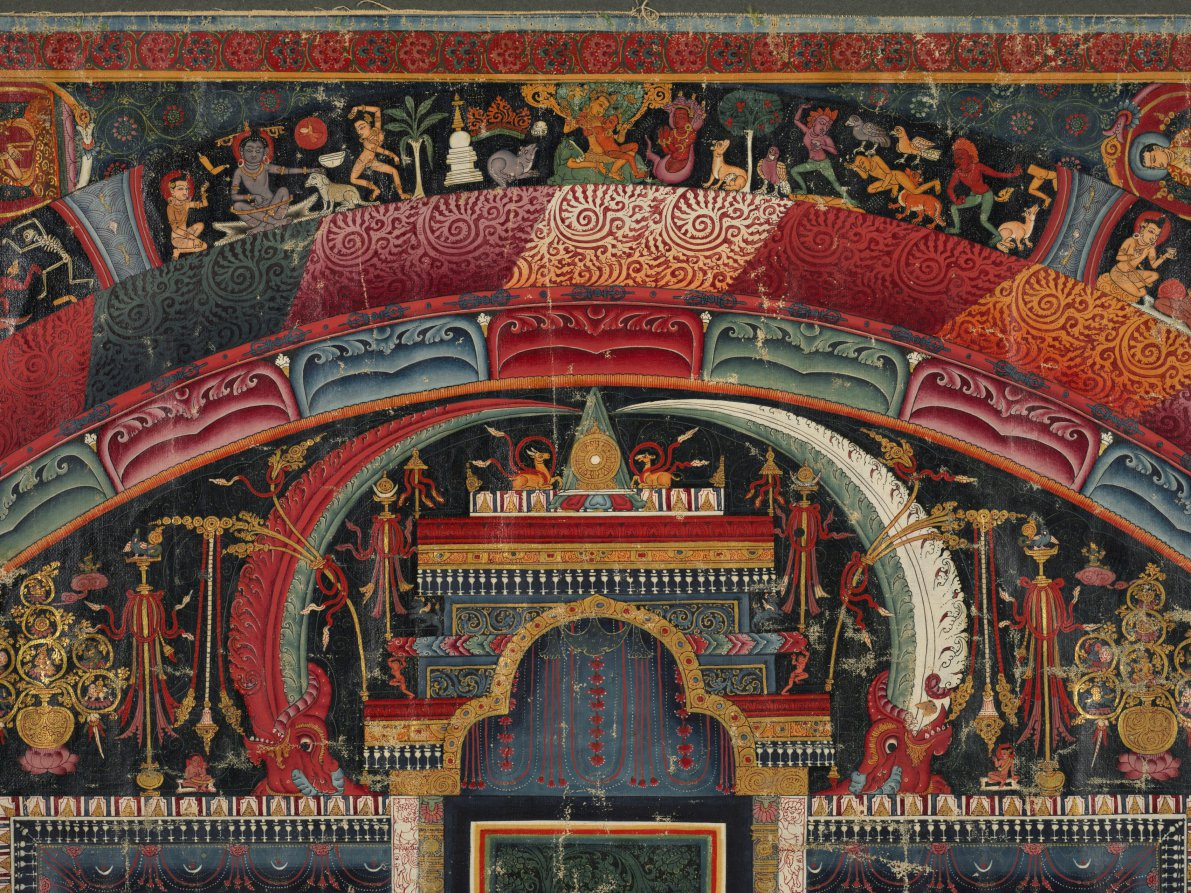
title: Twenty-three Deity Nairatma Mandala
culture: Central Tibet, Sakya-affiliated monastery, 14th century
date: c. 1375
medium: Gum tempera, ink, and gold on cloth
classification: Painting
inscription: The inscription along the bottom says: Twenty-three deity Nairatma Mandala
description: One of the main types of imagery in tantric Buddhist art is the mandala, a two-dimensional diagram of the realm of an enlightened being. This mandala depicts the palace of Nairatma, who dances in the center surrounded by her entourage. Using the painting as a guide, the tantric practitioner in meditation mentally projects the two-dimensional plan into three-dimensional space and enters into it. The outermost ring contains depictions of the cremation grounds, where corpses are being burned and consumed, as well as tantric yogis and masters who work there in order to understand the impermanence of the body, defeat their fear of death, and overcome irrational aversions to impure aspects of life. Virupa is depicted twice, always pointing to arrest the sun with his raised left hand. He sits among the row of lineage masters along the top edge, and is also depicted in the topmost segment of the ring of cremation grounds, being served a cup of liquor. Along with lineage masters at the top of this impressive painting, bodhisattvas and important masters are depicted in the spandrels, each identified by an inscription.